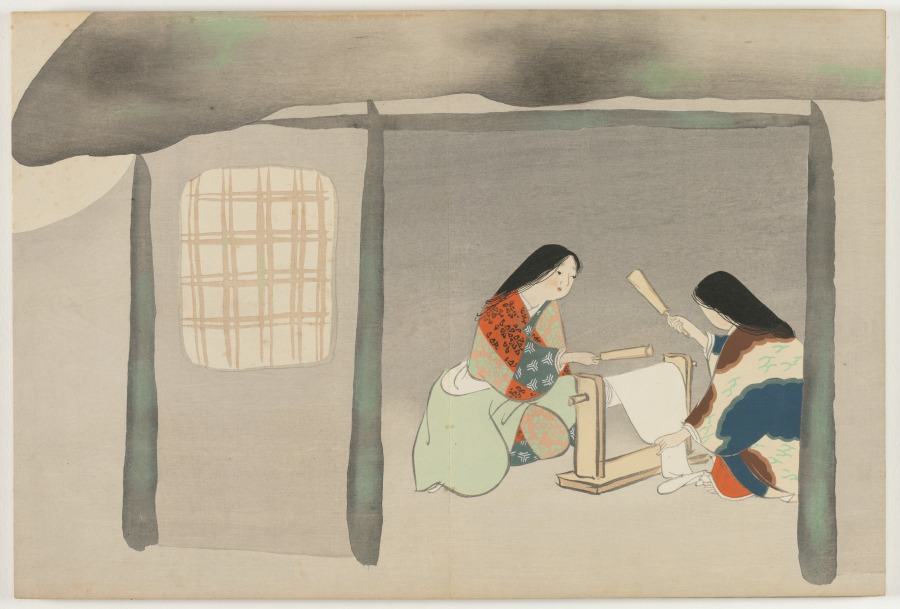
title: Flowers of a Hundred Worlds (Momoyogusa): Fulling Silk (Uchiginu)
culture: Japan, Meiji period (1868–1912)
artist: Kamisaka Sekka (Japanese, 1866–1942)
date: 1909–10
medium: color woodcuts with gold and silver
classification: Bound Volume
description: This print from a set of three woodblock printed albums displays the graphic design prowess of Kamisaka Sekka. The images were first distributed one by one to subscribers to the series but later were reissued in bound form, like this book, for mass consumers. Each print features a vignette taken from nature or Japanese literature. Many of the scenes have a long history in Japan, originating in the 900s or 1000s and having been interpreted by all manner of artists since that time. Sekka’s selections hew closely to precedents from the Rinpa style originated by painter Tawaraya Sōtatsu (c. 1570–c. 1640) and calligrapher Hon’ami Kōetsu (1558–1637).